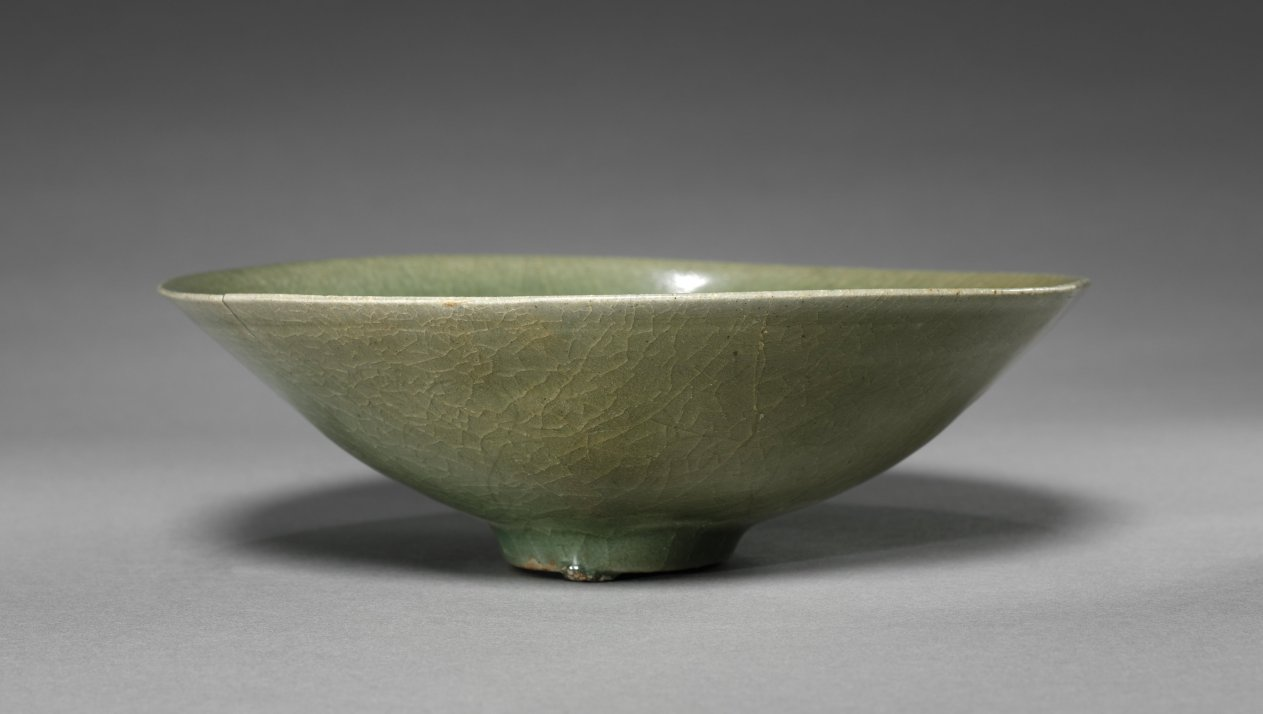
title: Bowl with Floral Scroll Design in Relief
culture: Korea, Goryeo dynasty (918–1392)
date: 1200s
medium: pottery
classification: Ceramic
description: As early as the seventh century, the practice of drinking tea and wine became an important part of elite culture in Korea. Elites of the Goryeo period commissioned a variety of types of utensils and vessels including this elegant tea bowl not only to make their drinking experience more exciting, but also to show their appreciation of nature.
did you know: The floral pattern of this bowl was created by a mold with carved patterns.